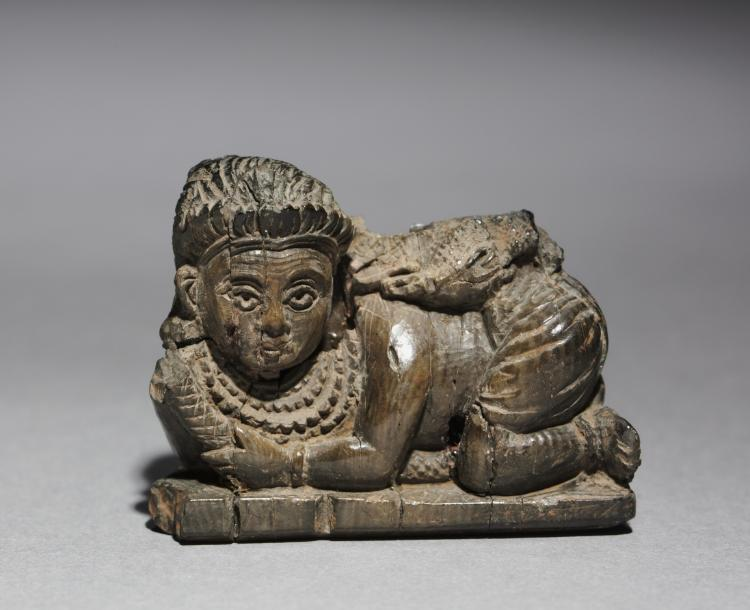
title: Figurine of a Crouching Woman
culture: Phoenicia, Syria, Arslan Tash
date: 900–800 BCE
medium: ivory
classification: Ivory